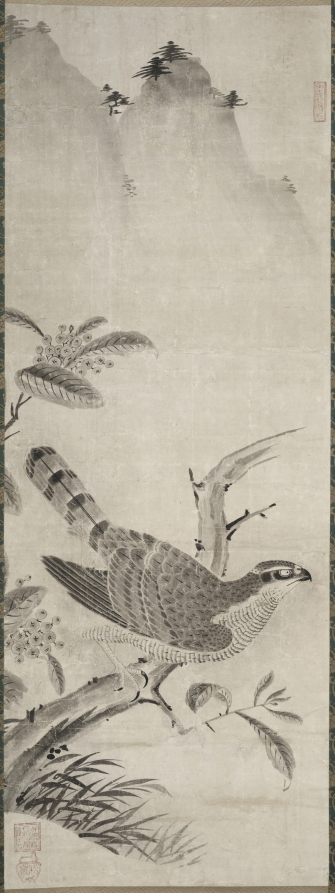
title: Hawk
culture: Japan, Muromachi period (1392–1573)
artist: Fujiwara Masayoshi (Japanese)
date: mid-1500s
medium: hanging scroll; ink on paper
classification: Painting